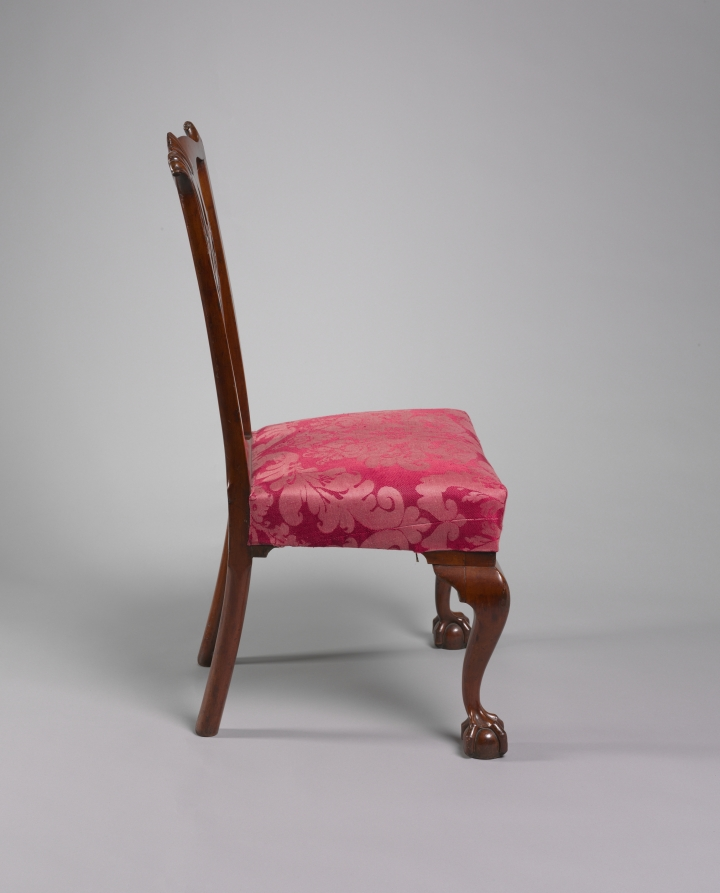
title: Side Chair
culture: America, Connecticut, East Windsor, 18th century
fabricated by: Eliphalet Chapin (American, 1741–1807)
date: c. 1775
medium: cherry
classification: Furniture and woodwork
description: Before becoming one of the best known Connecticut furniture makers of the late 1700s, Eliphalet Chapin worked in New York City and Philadelphia. His furniture shows evidence of that experience. For example, the back of this chair has a splat design found on New York pieces, while the untapered rear legs and the shell carving on the crest rail are typical of Philadelphia workmanship. The use of cherry, however, is characteristic of Connecticut furniture. This chair comes from a set recorded in Chapin's account book as having been supplied to Ebenezer Grant to form part of the dowry of his daughter Anne, who married the Reverend John Marsh of Wethersfield, Connecticut, on December 6, 1775. The set was owned by their descendants until 1986.